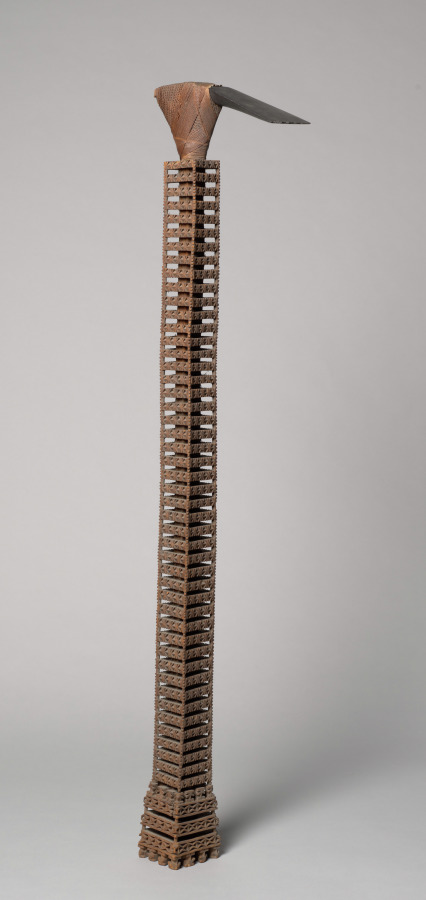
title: Ceremonial Adze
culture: Polynesia, Mangaia, Cook Islands, 19th century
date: 1800s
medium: wood, stone, fiber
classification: Sculpture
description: Before European contact, Polynesian carving tools were fashioned from bone, shell, stone, or teeth. The introduction of iron tools facilitated carving, while the demand of European sailors and missionaries for souvenirs provided a new market for craft products. Ceremonial adzes probably represented gods or spirits. The wooden handle of this example is carved with the characteristic K motif. The stone adze blade is lashed to the handle with finely plaited sennit fiber cord. According to legend, the distinctive pattern formed by the sennit lashing was taught to Mangaian craftsman by the gods.